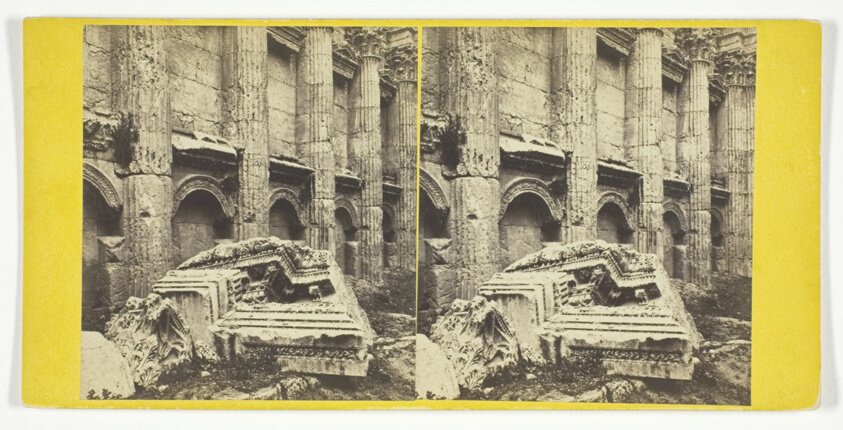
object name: Photograph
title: Baalbek - Temple of Jupiter, No. 71 from "Good's Eastern Series"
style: 19th century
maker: Frank M. Good; English, active 1860-1890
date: 1860/90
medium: Albumen print, stereo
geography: Baalbek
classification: photography; photograph; albumen silver print; stereograph (albumen)